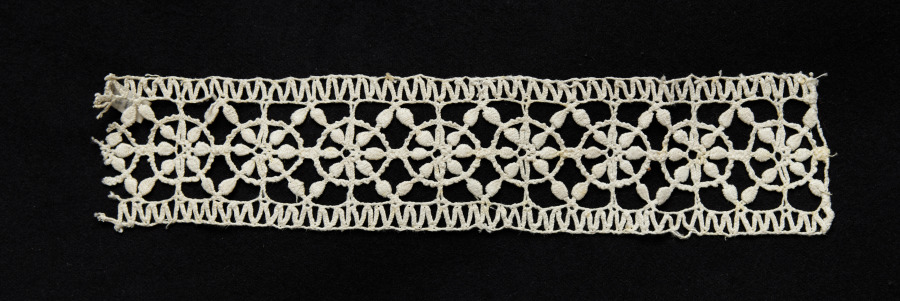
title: Lace Insertion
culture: Italy, Genoa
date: 1550–99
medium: Bobbin lace (needle lace, reticella design)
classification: Lace